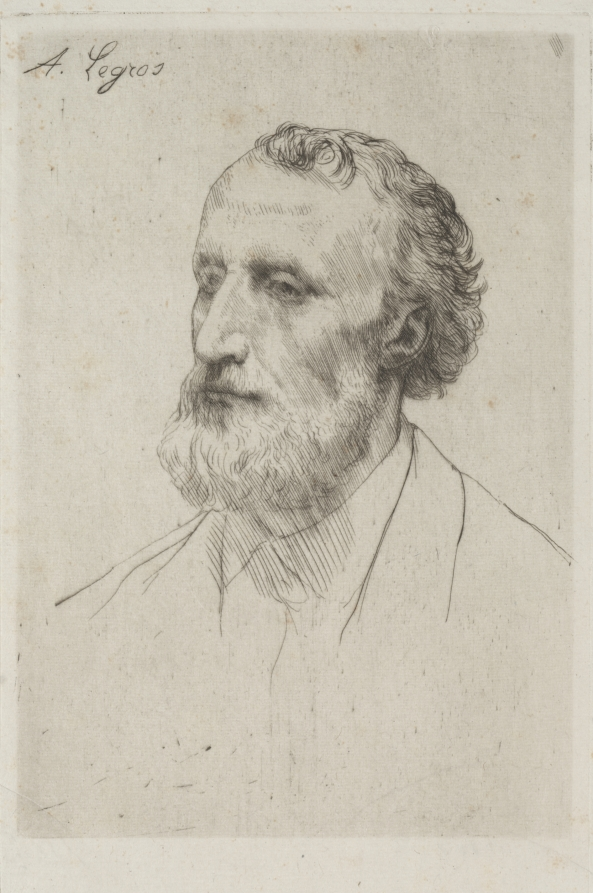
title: Jules Dalou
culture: France, 19th century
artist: Alphonse Legros (French, 1837–1911)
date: 1876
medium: drypoint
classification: Print